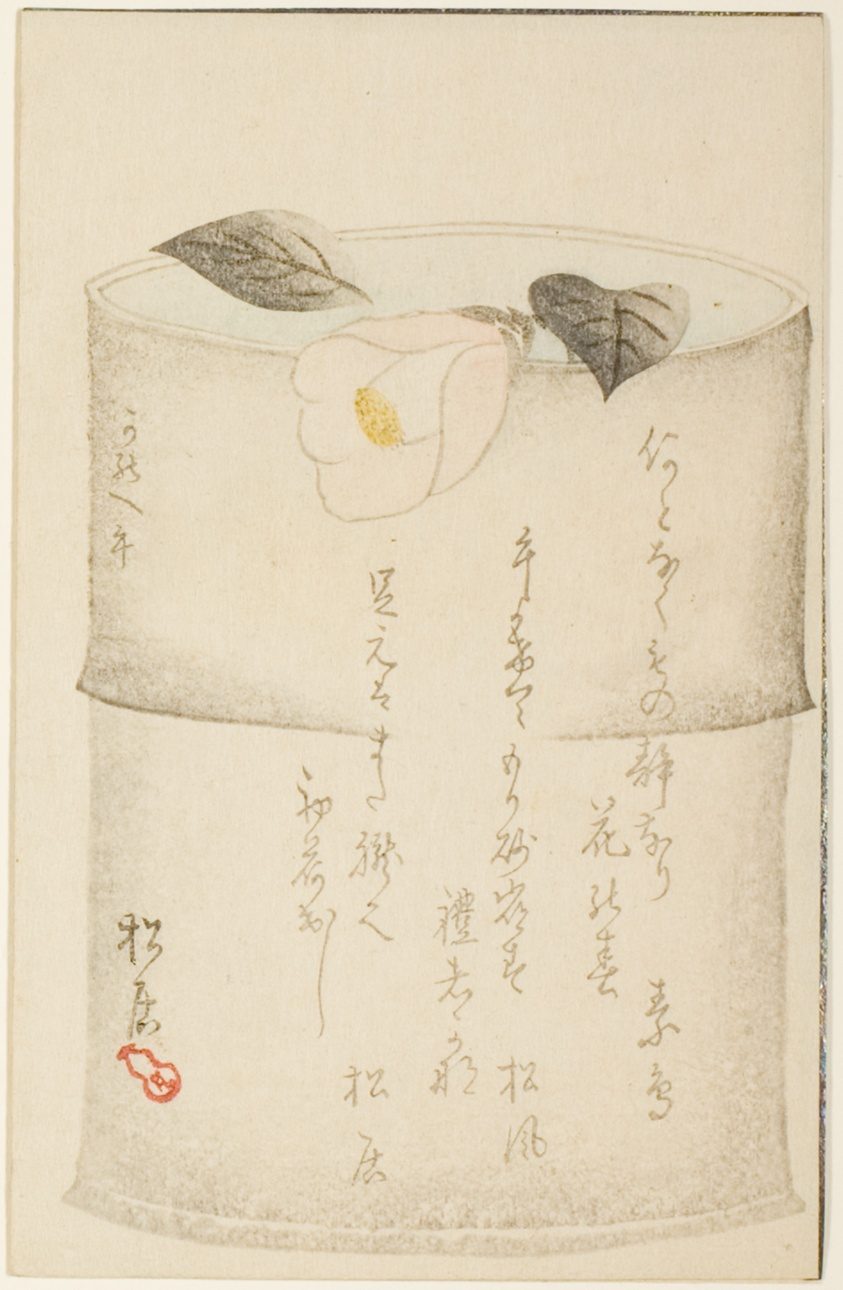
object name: Print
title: Camellia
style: Japanese (culture or style)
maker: Shokyo; Japanese, active late 19th century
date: 1870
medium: Color woodblock print; surimono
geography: Japan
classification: woodblock print; print; asian art